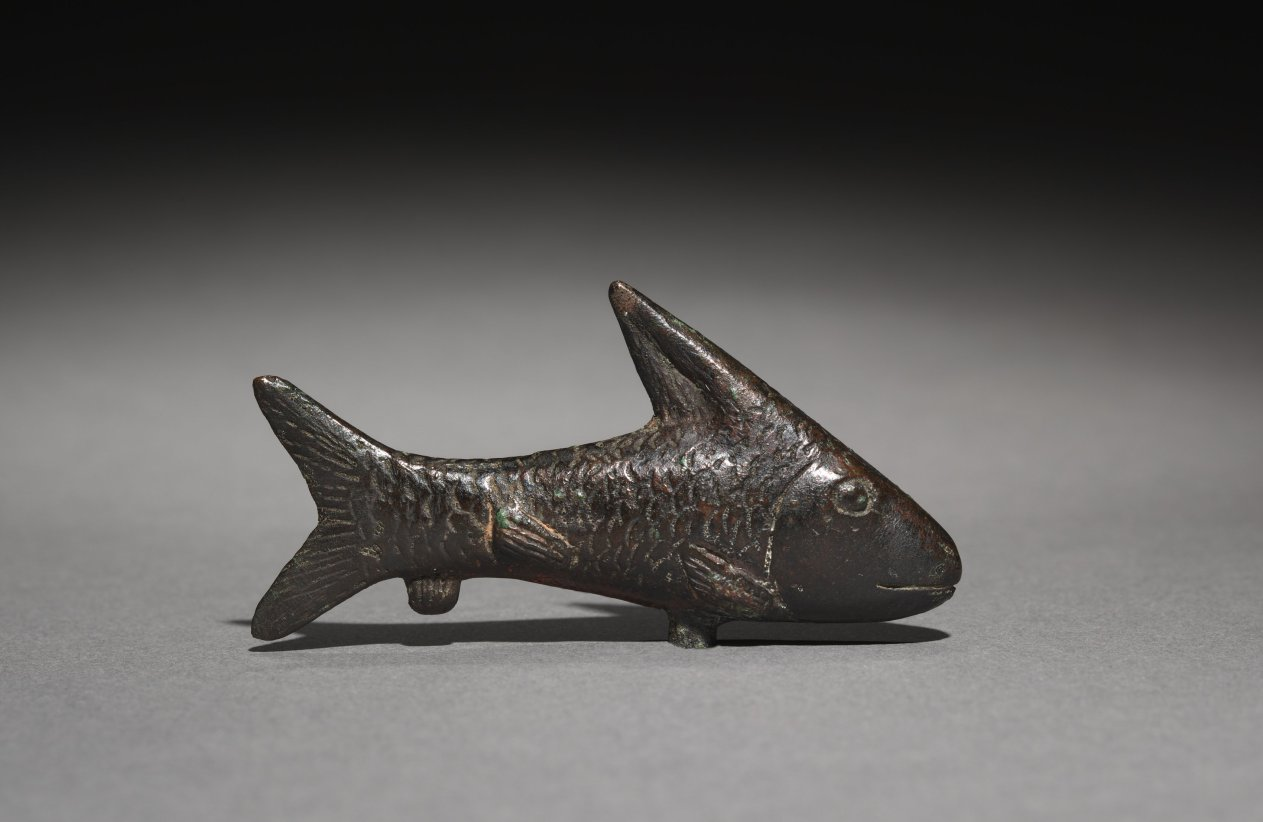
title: Small Lepidotus Fish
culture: Egypt, Greco-Roman period (332 BCE–395 CE), Ptolemaic dynasty (305–30 BCE)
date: 305–30 BCE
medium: bronze, hollow cast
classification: Sculpture